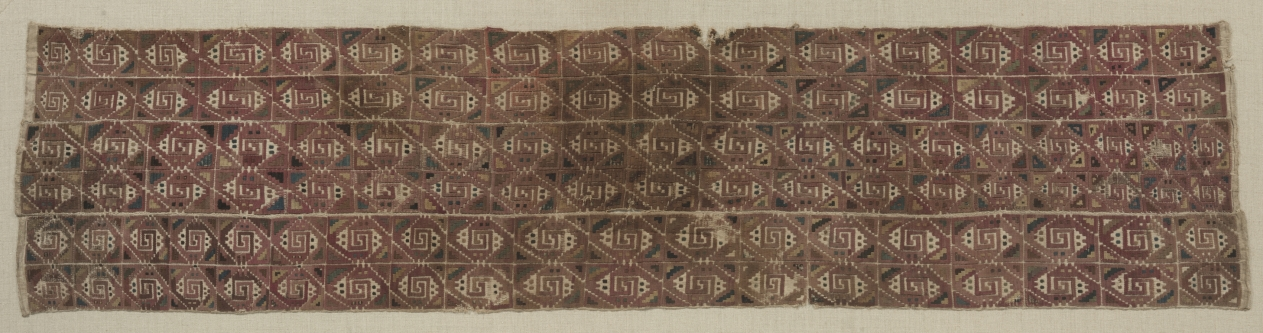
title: Large Cloth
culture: Peru, North Coast, Chimú Culture, 12th-15th century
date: c. 1100–1400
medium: plain cloth with overlaid tapestry-like decoration; cotton and wool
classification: Textile